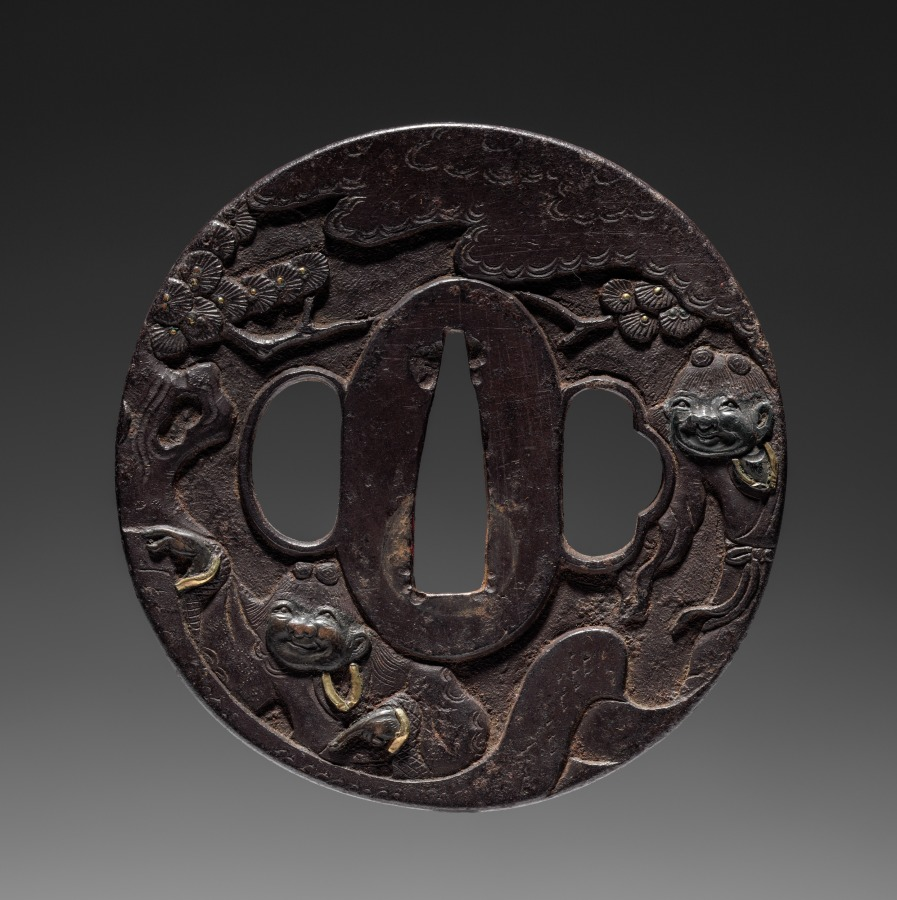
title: Sword Guard (Tsuba) with Hanshan and Shide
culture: Japan, possibly Edo period (1615-1868)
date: c. 1615–1868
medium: iron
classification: Arms and Armor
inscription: signed: 山城住國重